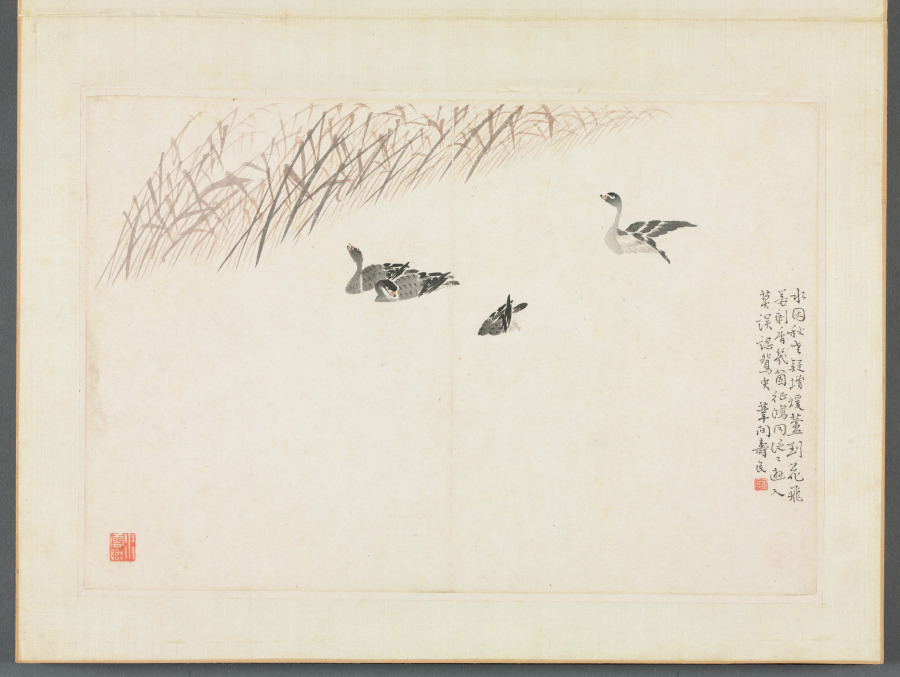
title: Album of Calligraphy and Paintings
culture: China, Qing dynasty (1644-1911)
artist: Bian Shoumin (Chinese, 1684–1752)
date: first half of the 1700s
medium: album leaf; ink and color on paper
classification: Painting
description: The artist Bian Shoumin is known for his depiction of wild geese, water, and reeds. The migrant birds in autumn and winter evoked, in the minds of the Chinese intelligentsia, a time of parting and sorrow.